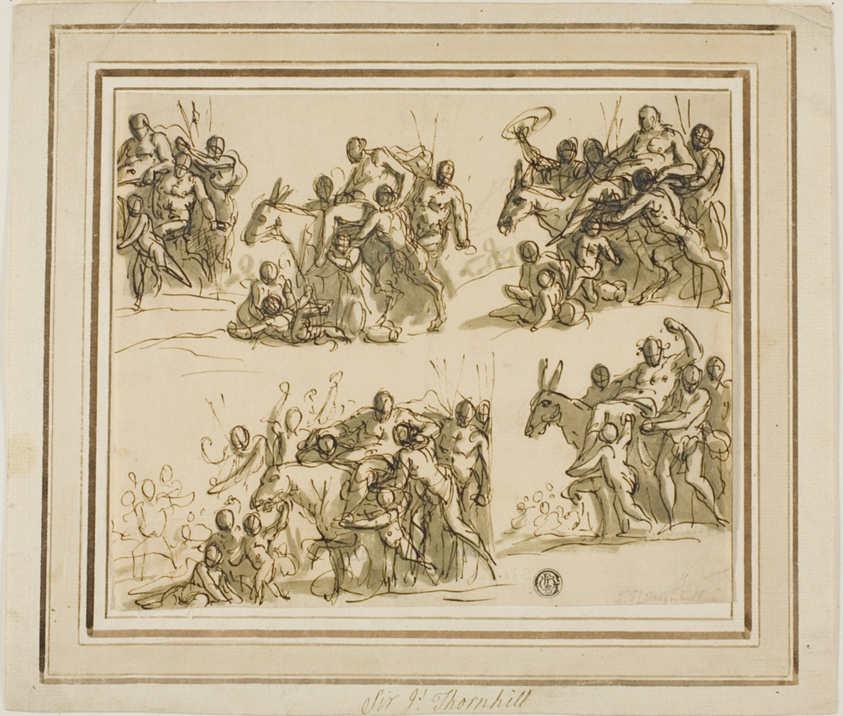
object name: Drawing and Watercolor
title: Five Sketches for the Triumph of Silenus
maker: James Thornhill (English, 1675-1734)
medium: Pen and brown ink with brush and green wash, over traces of graphite, on cream laid paper, tipped onto ivory laid paper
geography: England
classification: pen and ink drawings; drawings (visual works); prints and drawing